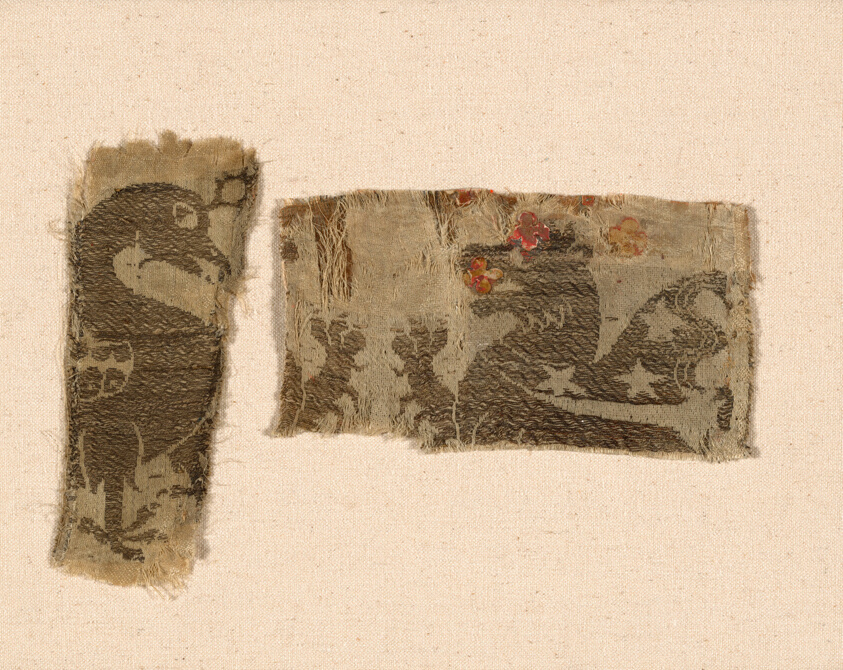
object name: Textile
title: Two Fragments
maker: Italy or Spain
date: 1350/1400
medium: Silk and gilt-animal-substrate-wrapped linen, plain weave with plain and 1:3 twill interlacings of secondary binding warps and supplementary patterning wefts; embellished with pigment on paper forms affixed with wax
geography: Italy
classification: textile; weaving